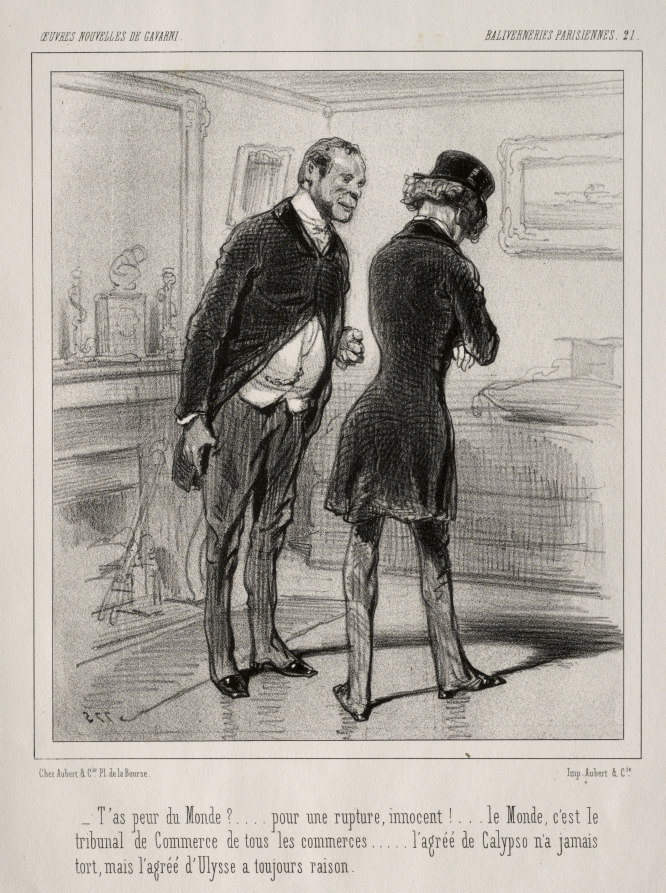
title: Baliverneries Parisiennes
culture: France, 19th century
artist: Paul Gavarni (French, 1804–1866)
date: c. 1847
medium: lithograph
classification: Print